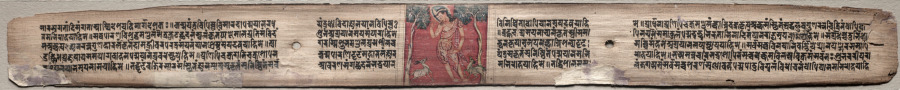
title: Sudhana and a pair of antelopes, folio 37 (recto) from a Gandavyuha-sutra (Scripture of the Supreme Array)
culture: Nepal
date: 1000–1100s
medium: gum tempera and ink on palm leaf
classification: Painting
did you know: The halo of the pilgrim is ringed with flames as he preaches to a pair of deer in the wilderness.